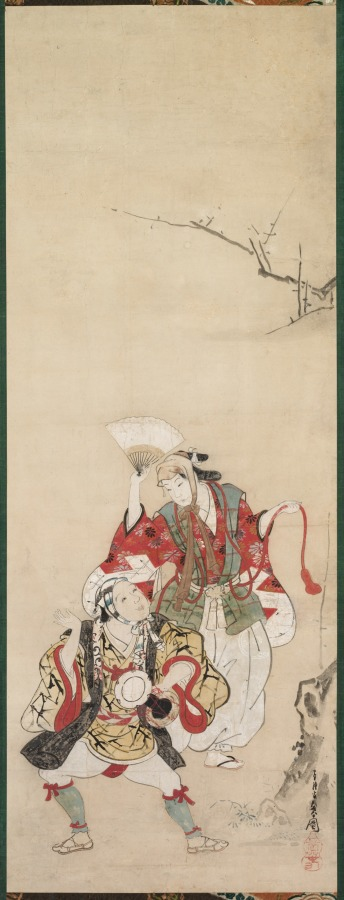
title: Spring Dancers (Manzai)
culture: Japan, Edo period (1615–1868)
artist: Miyagawa Chōshun (Japanese, 1683–1753)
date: early to mid-1700s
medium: hanging scroll; ink and color on paper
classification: Painting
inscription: Artist's signature and gourd-shaped seal lower right corner.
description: Manzai is the Japanese term for wandering comic dancers. The painting depicts one of the traditional pleasures of the spring season.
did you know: One performer is playing a hand-held drum, like CMA 1918.349.